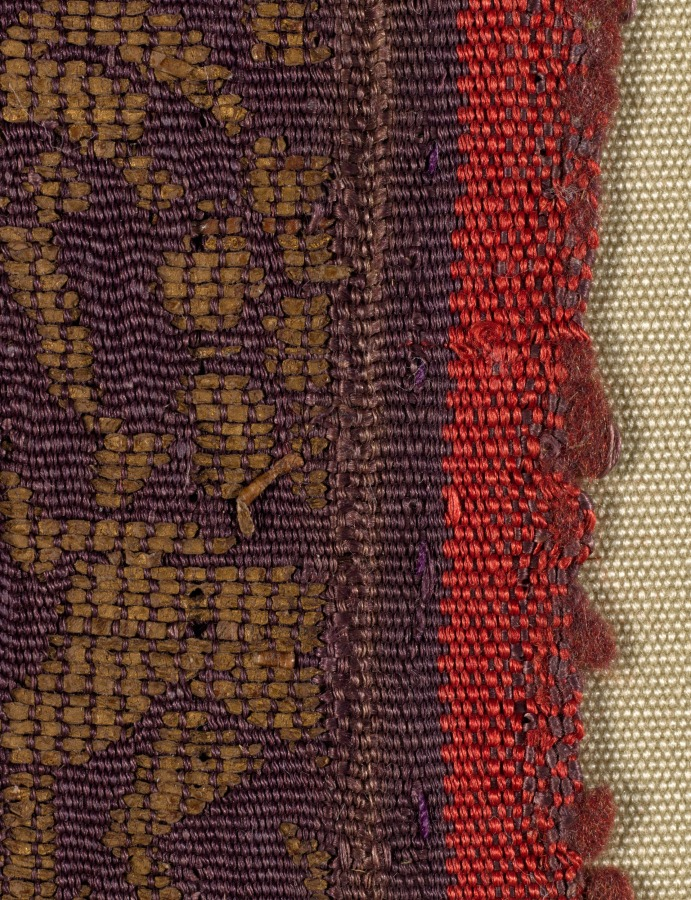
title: Brocade with Hares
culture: Northern China, Yuan dynasty (1271-1368)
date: 1200s–mid-1300s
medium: Silk: tabby, brocaded; gold thread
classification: Textile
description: The motif of the hare among bushes may relate to the hunting activities of the Khitan, the Jurchen, and the Mongols. Hare hunts are recorded in the Liaoshi (History of the Liao Dynasty) and were often reported by envoys returning to China from the northern states. The asymmetry of the image in this textile is characteristic of Jin brocades. However, the paired (instead of single) warps reveal the influence of craftsmen from the eastern Iranian world and therefore dates the textile to the Mongol period.